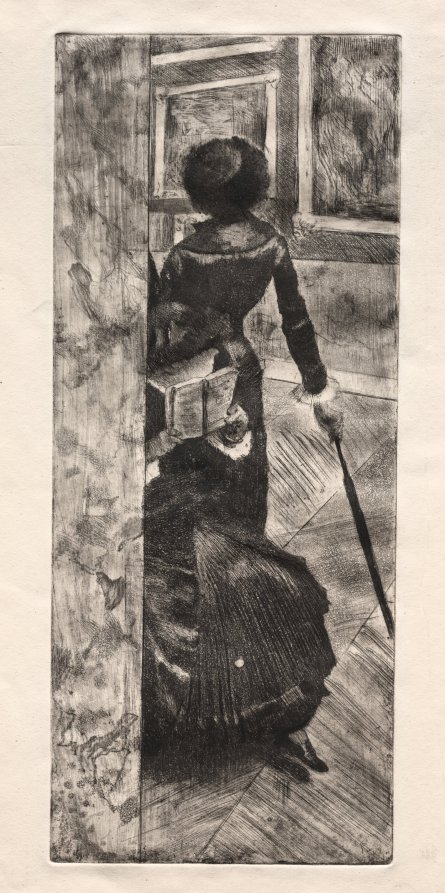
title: Mary Cassatt at the Louvre: The Paintings Gallery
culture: France, 19th century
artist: Edgar Degas (French, 1834–1917)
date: 1879–80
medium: etching, softground etching, and aquatint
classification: Print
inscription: Watermark: [BLAC]ONS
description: Cassatt said that she posed for Degas "only once in a while when he finds the movement difficult and the model cannot seem to get his idea." In fact, she modeled for her friend on numerous occasions beginning in 1879 for a pastel titled At the Louvre, upon which Degas based this etching. Here, Degas showed Cassatt and her sister Lydia in Paris's Musée du Louvre, both involved in studying the paintings on view. Created at a time when women were less frequently seen alone in pub spaces, the image suggests the young women's independence and confidence.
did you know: Around the same time, Edgar Degas made a second etching showing Mary Cassatt in the Musée du Louvre, this time in the Etruscan Gallery.